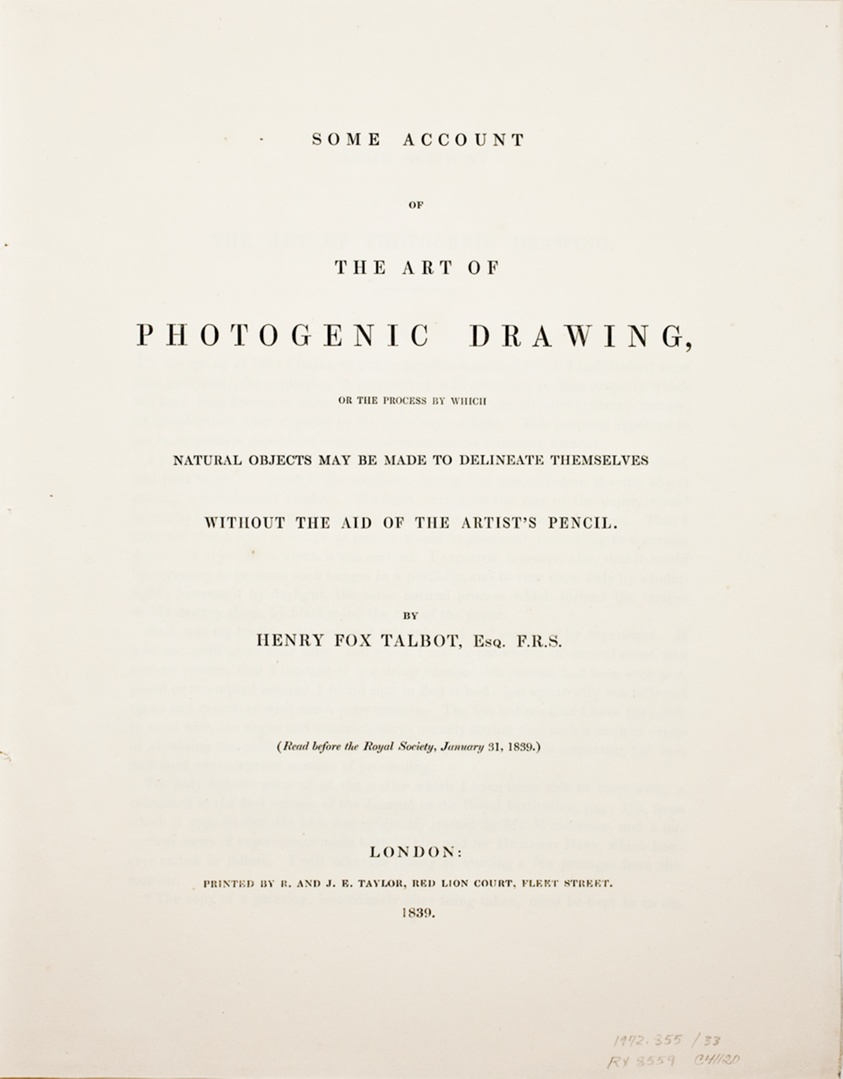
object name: Photograph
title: Some Account of the Art of Photogenic Drawing, or the Process by which Natural Objects May Be Made to Delineate Themselves without the Aid of the Artist's Pencil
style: 19th century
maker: William Henry Fox Talbot (English, 1800–1877)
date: Read before the Royal Society, January 31, 1839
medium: Thirteen pages of text on paper (approximately 6500 words) without illustrations, published by R. & J.E. Taylor, London, 1839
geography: England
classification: ink on paper; printing process; photography; photograph